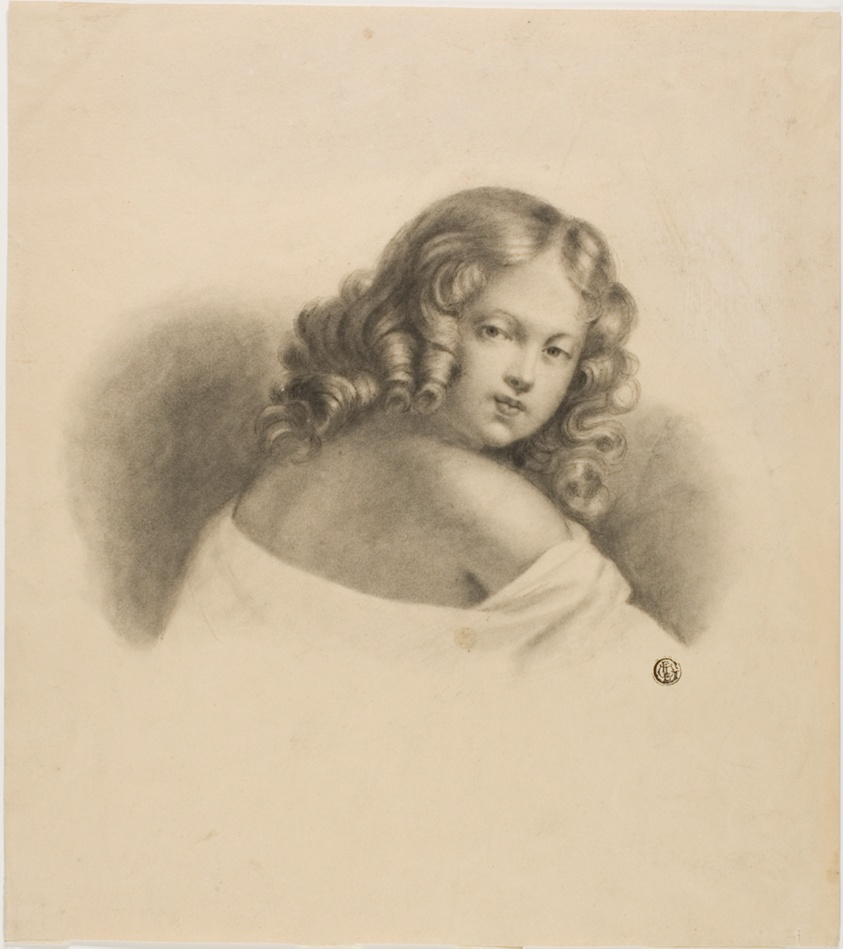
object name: Drawing and Watercolor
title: Child with Curly Hair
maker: Unknown Artist; European, n.d.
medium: Charcoal, with stumping, on cream wove paper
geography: Europe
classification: charcoal; drawings (visual works); prints and drawing